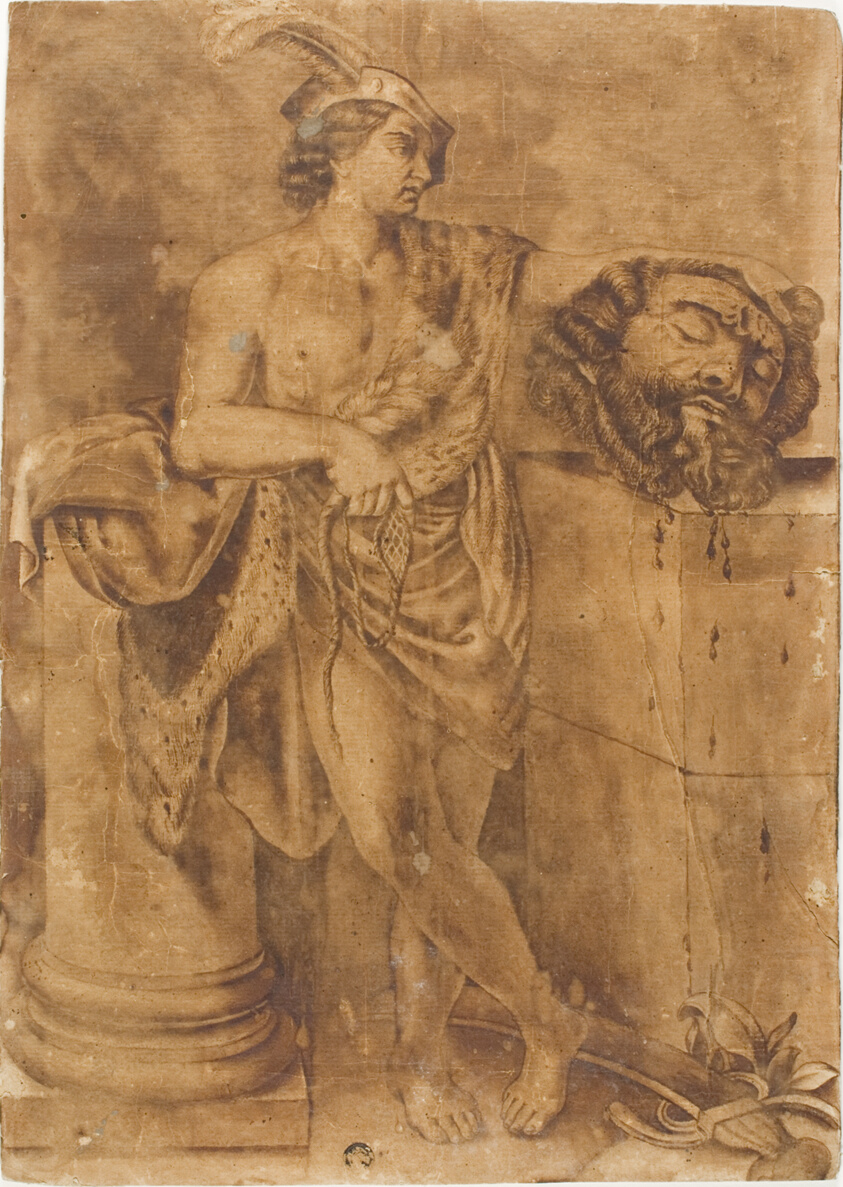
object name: Drawing and Watercolor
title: David with the Head of Goliath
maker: After Guido Reni; Italian, 1575-1642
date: after 1605/06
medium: Pen and brown ink and brush and brown wash on cream laid paper, laid down on tan wove card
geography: Italy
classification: ink or chalk wash; drawings (visual works); prints and drawing